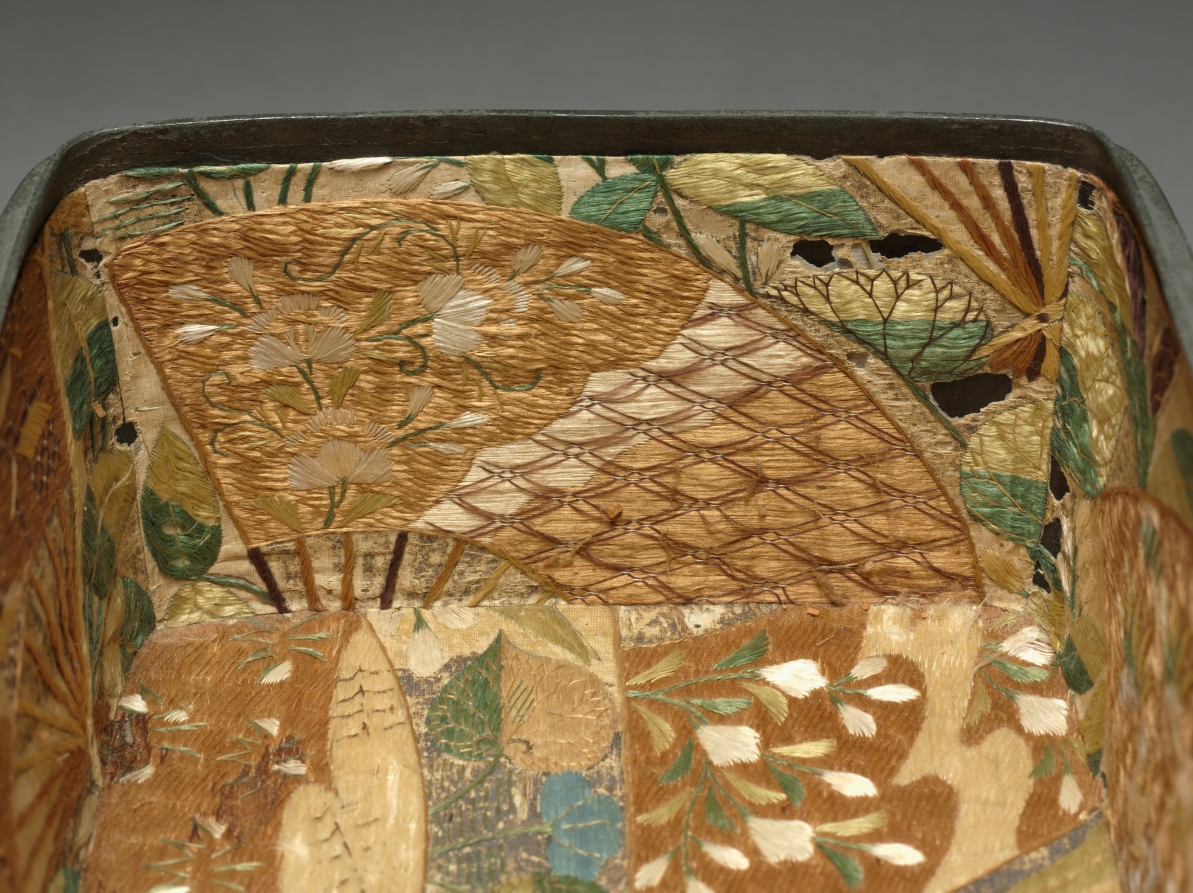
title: Cosmetics Box with Chrysanthemums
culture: Japan, Kamakura period (1185–1333)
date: early 1300s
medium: lacquer on wood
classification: Lacquer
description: In China, the chrysanthemum was historically appreciated for its association with the Double Nine Festival and the reclusive life of the poet Tao Yuanming (AD 365-427). In Japan, the 16-petaled chrysanthemum came to symbolize the Japanese imperial family after Emperor Gotoba (1180-1239) chose the motif as his personal emblem, having it applied to his sword and everyday utensils. This box proves that the flower also appeared on lacquer wares as early as the Kamakura period.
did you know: In Japanese, this type of small box is called a tebako, literally a hand box, and was typically part of a cosmetics set.